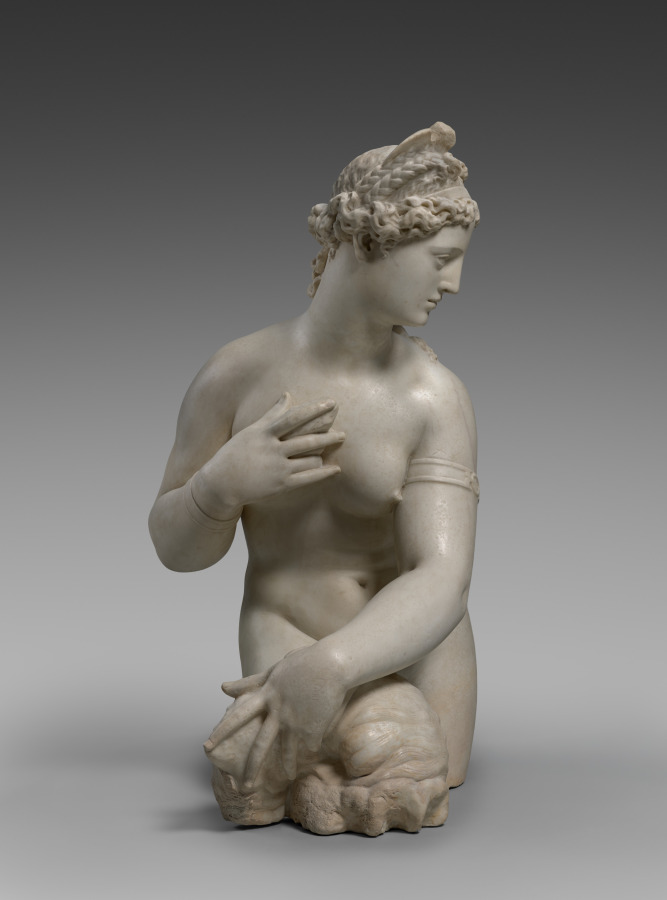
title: Fata Morgana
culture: Italy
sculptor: Giambologna (Flemish, active Italy, 1529–1608)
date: c. 1572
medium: Marble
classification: Sculpture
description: Commissioned by prominent banker Bernardo Vecchietti, whose surname means “old,” Fata Morgana took the name both of the nearby spring that fed the fountain she surmounted, and the legendary fairy who restored King Arthur’s youth. The Fata Morgana is one of only around a dozen sculptures in marble by Giambologna. The artist’s favorite subject was the female nude because of its capacity to showcase his extraordinary ability to model softness in hard stone and to convey dynamic movement. Her twisting pose invites the viewer to appreciate the Fata Morgana from every angle.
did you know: The sculpture originally appeared to emerge mysteriously from a cave within a constructed grotto.